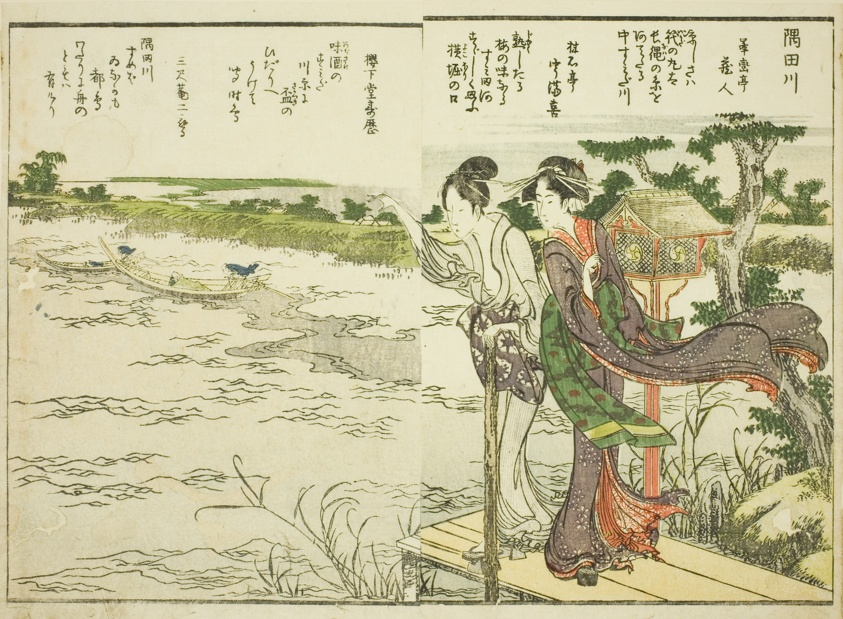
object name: Print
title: Sumida River, from vol. 1 of the illustrated book "Fine Views of the Eastern Capital at a Glance (Toto shokei ichiran)"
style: Japanese (culture or style)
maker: Katsushika Hokusai 葛飾 北斎; Japanese, 1760-1849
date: 1800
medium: Color woodblock print; double-page illustration from book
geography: Japan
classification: woodblock print; print; asian art